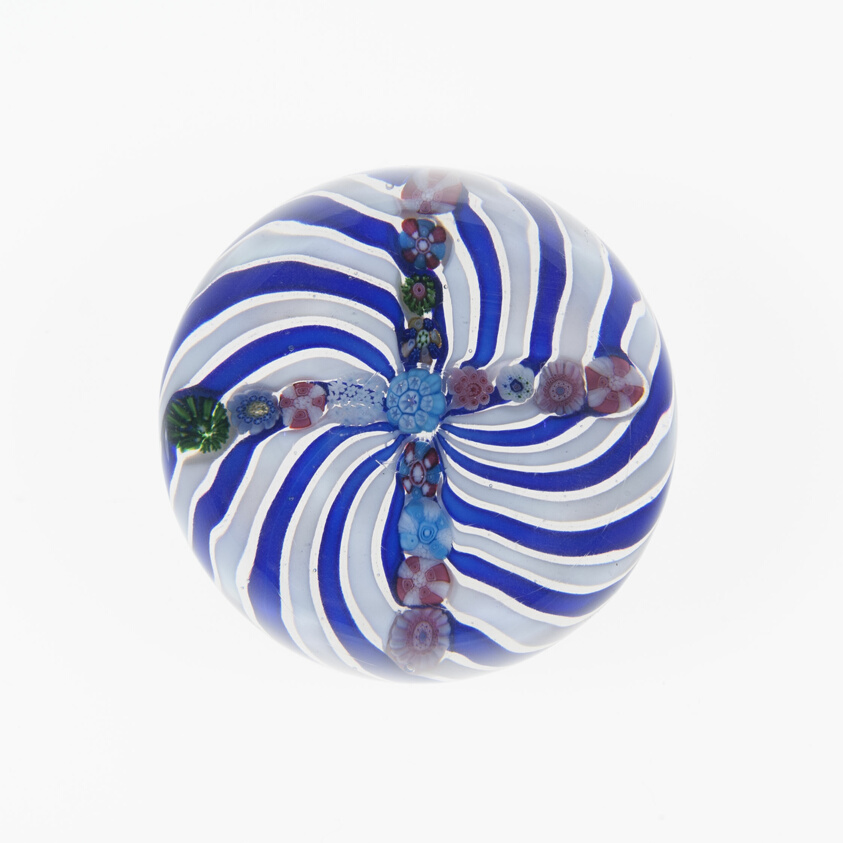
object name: Glass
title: Paperweight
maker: Clichy Glassworks (Cristalleries de Clichy); Clichy, France, 1837-1885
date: c. 1845/60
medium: Glass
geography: France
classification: paperweight; glass